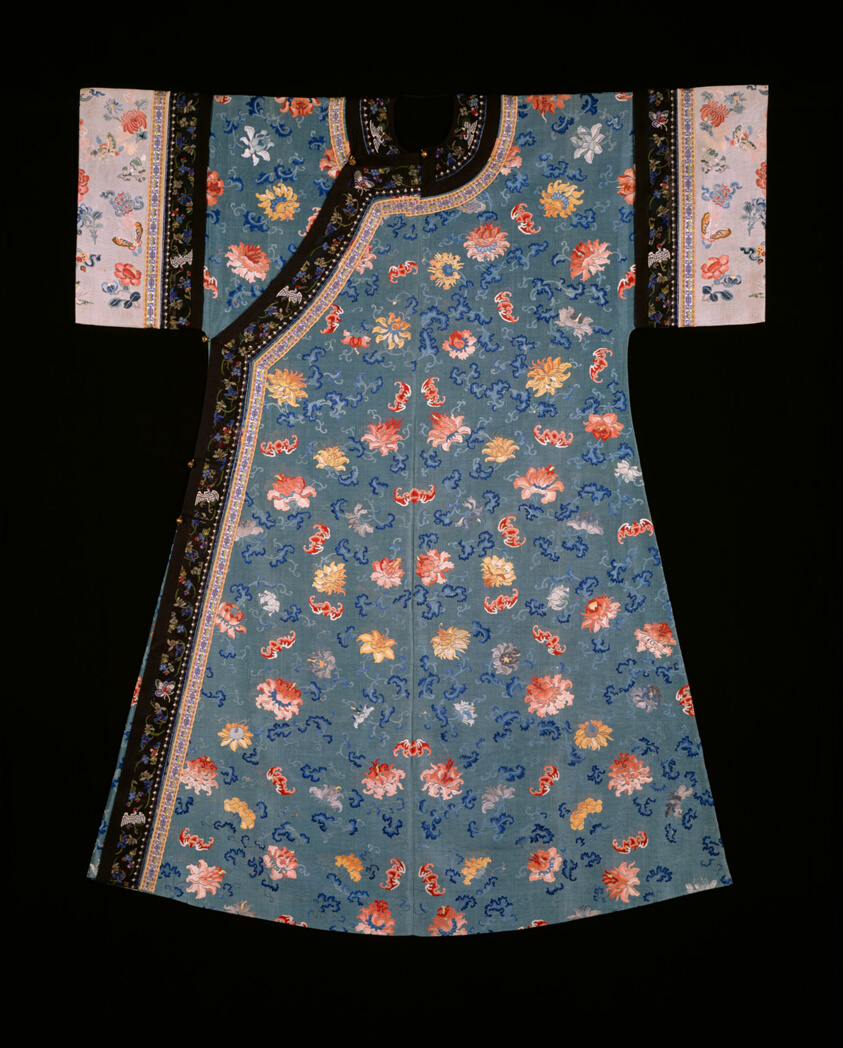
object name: Costume and Accessories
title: Woman's Changfu (Informal Court Robe)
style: qing, Chinese (culture or style), East Asian, asian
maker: Manchu (China)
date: Qing dynasty (1644–1911), late 19th/early 20th century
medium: Silk, plain gauze weave; embroidered in back and stem stitches; sleeve facings: silk, plain gauze weave; embroidered in back, knot, overcast, stem, and straight stitches; laid work and couching; ribbon: silk and gold-leaf-over-lacquered-paper-strip-wrapped cotton, plain weave with supplementary patterning warps and extended weft loop fringe; sleeves trimmed with silk, plain weave; metal buttons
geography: China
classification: textile; costume; needlework (visual works)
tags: flowers, yellow (color), white (color), pink (color), lotus, butterflies, blue (color), black (color)